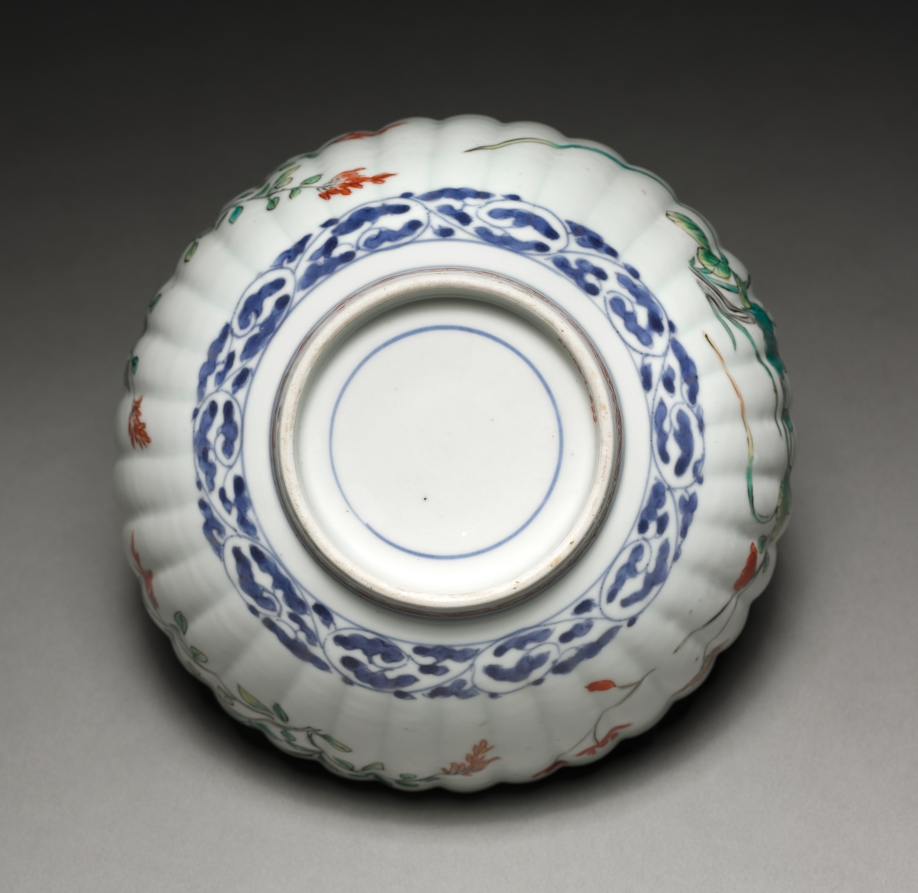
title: Fluted Bowl with Dragon, Butterfly, and Flowers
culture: Japan, Edo period (1615–1868)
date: early 1700s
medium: Porcelain with underglaze blue and overglaze color enamels and gold (Hizen ware, Kakiemon type)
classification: Ceramic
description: A dragon encircled by sprays of flowers and a butterfly enliven the interior of this fluted bowl. The exterior has similar decoration, with touches of gold on some petals. The flutes enhance both the visual and tactile experience; their tapered forms draw the eye from the edges inward and provide ridges for the hands.